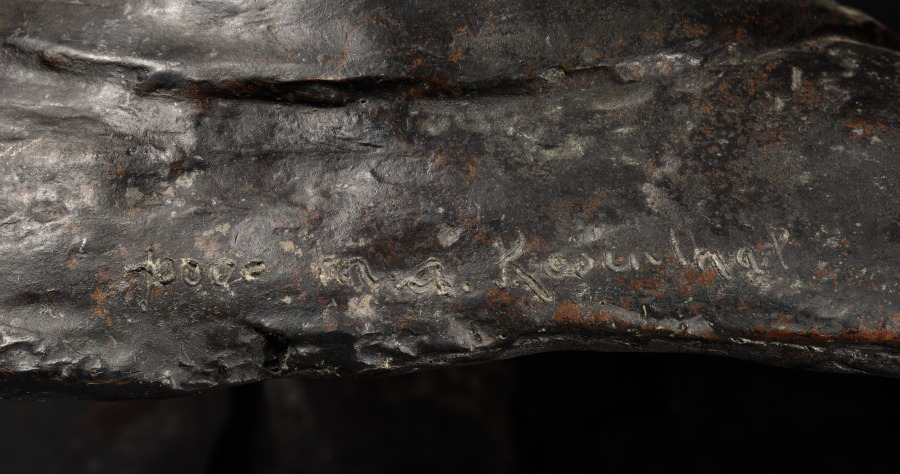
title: Claude Monet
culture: France, 20th century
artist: Paul Paulin (French, 1852–1937)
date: late 1800s-early 1900s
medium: bronze, marble base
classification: Sculpture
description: Paul Paulin was a renowned Parisian dentist who had a passion for sculpting and was encouraged by Edgar Degas to pursue an artistic career. Paulin is best known for his portrait busts of notable Impressionists. There are related versions of this portrait bust of the celebrated painter Claude Monet at three museums in Paris: the Petit Palais (plaster), the Musée d'Orsay (bronze), and the Musée Rodin (bronze).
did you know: In addition to Claude Monet, Paul Paulin also made portrait busts of Edgar Degas, August Renoir, Camille Pissarro, and Auguste Rodin.